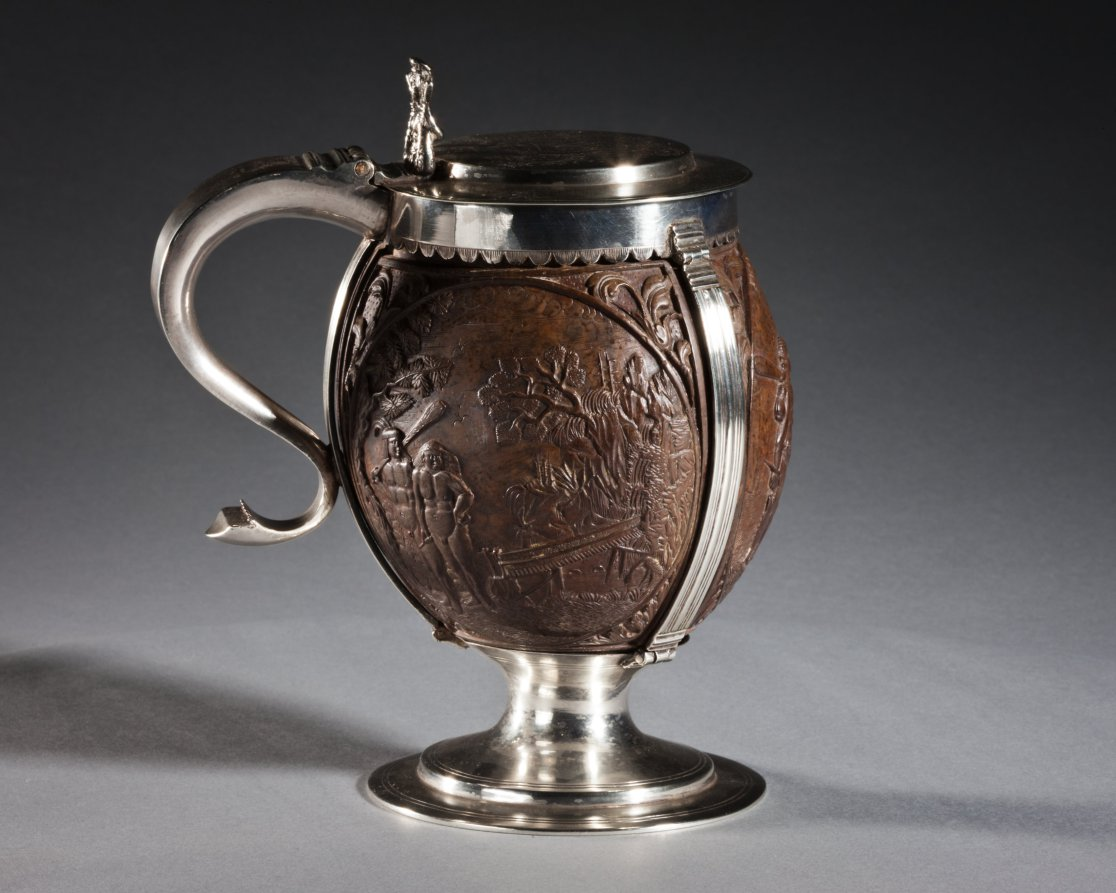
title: Coconut Cup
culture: carved coconut, probably The Netherlands; silver mount, probably England, 17th century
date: c. 1630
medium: carved coconut in silver mount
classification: Metalwork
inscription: top lid has engraved coat-of-arms, underside of lid has inscription: George Lewis TIVERTON Feby, 1st 1760.